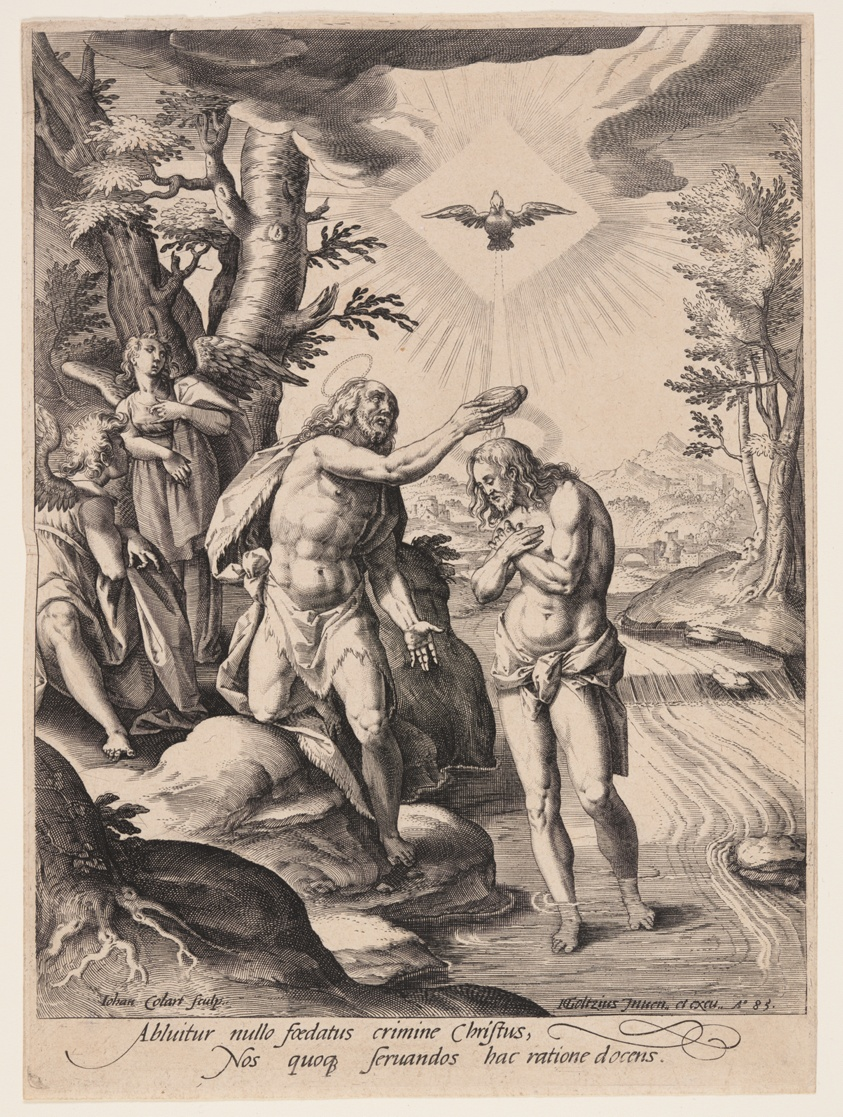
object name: Print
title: The Baptism of Christ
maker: Jan Collaert II (Flemish, c. 1561-c. 1620); after Hendrick Goltzius (Dutch, 1558–1617)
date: 1585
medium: Engraving on laid paper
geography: Flanders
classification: engraving; paper; print; prints and drawing